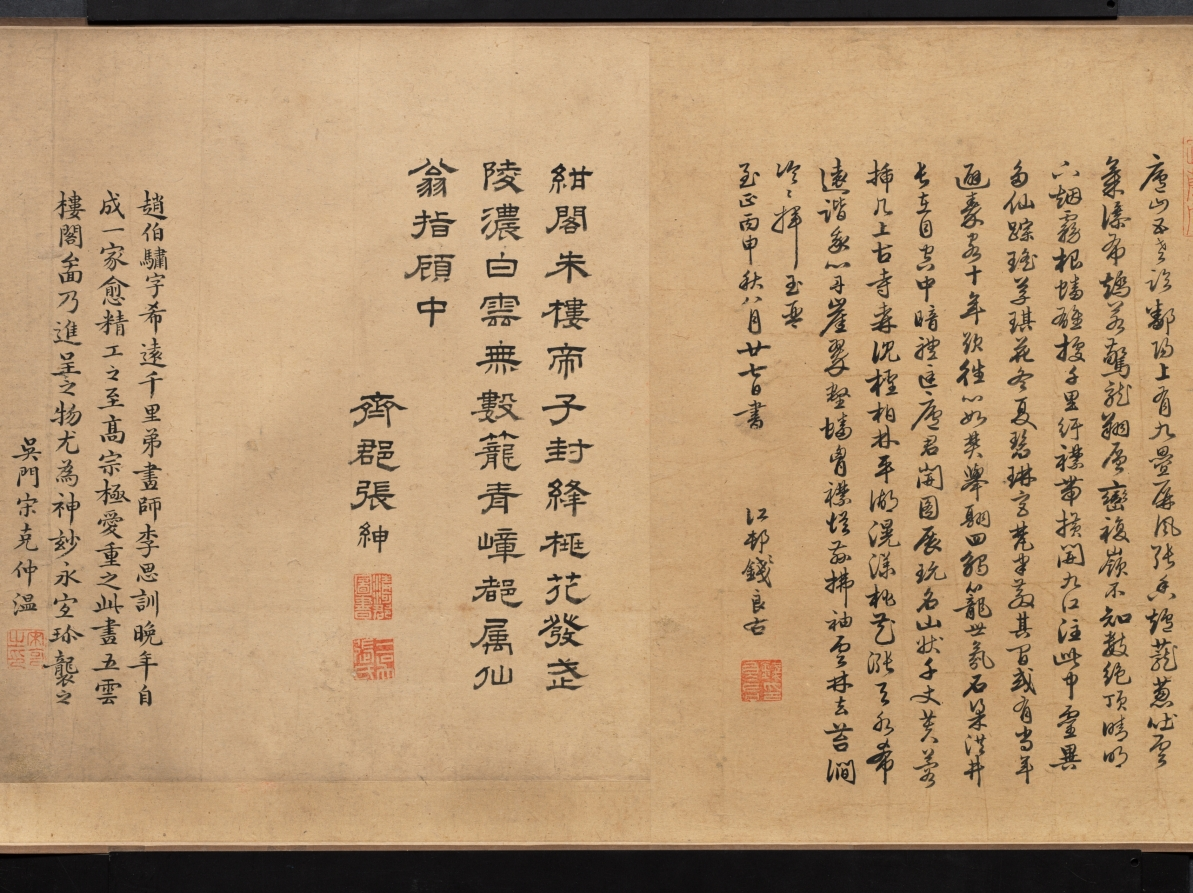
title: Landscape, The Palace of the Clouds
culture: China, Qing dynasty (1644-1911)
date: 1644–1911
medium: handscroll, ink on silk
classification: Painting